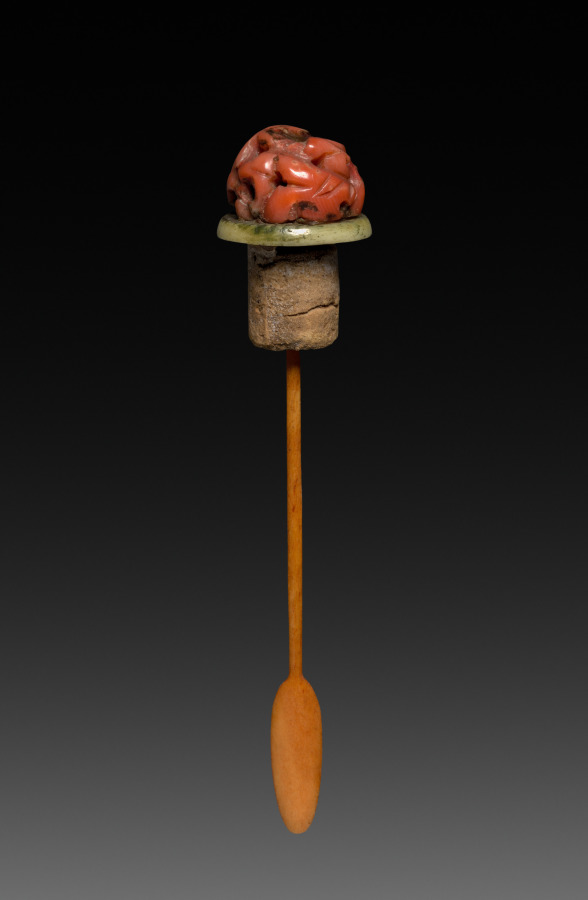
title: Snuff Bottle (stopper)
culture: China, Qing dynasty (1644-1911), Kangxi reign (1662-1722)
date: 1662–1722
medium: porcelain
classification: Ceramic